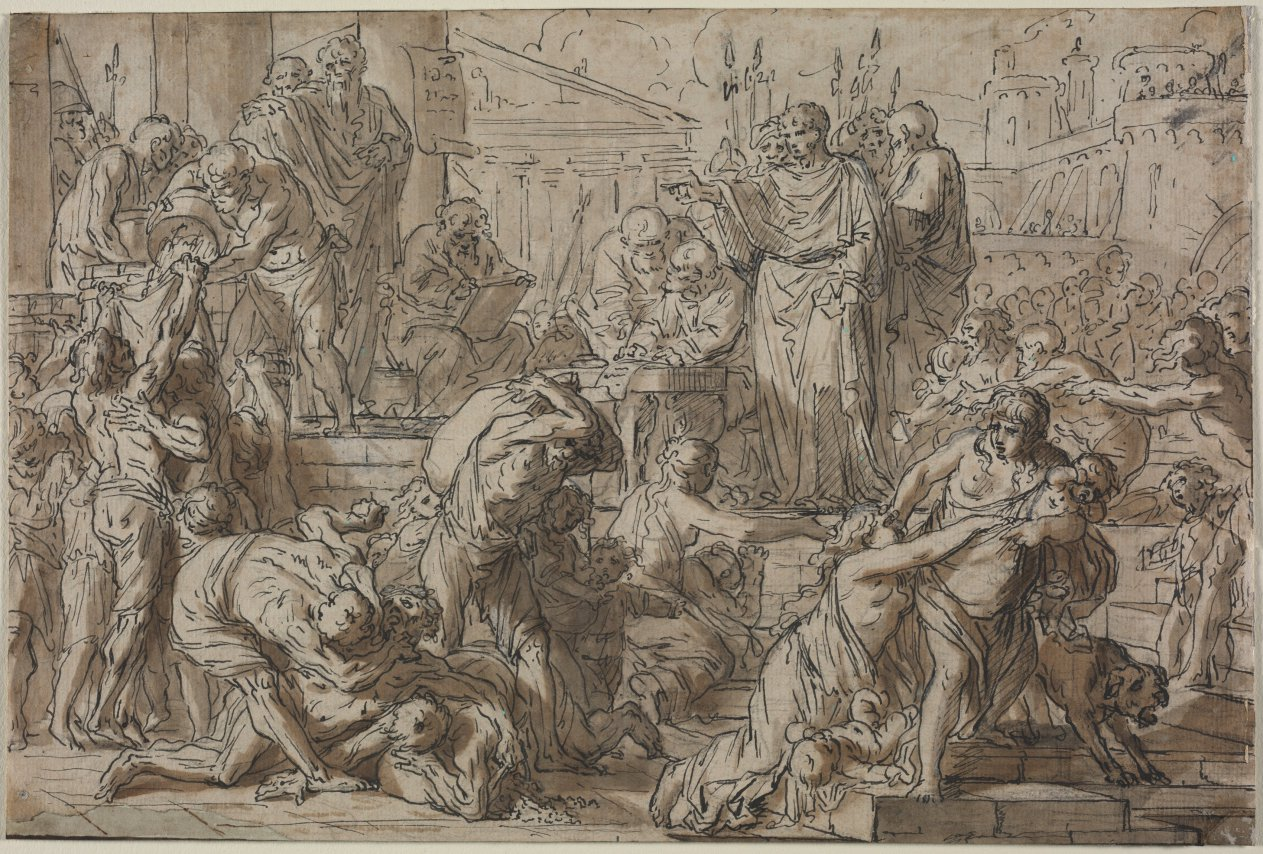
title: Roman Subject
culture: France, 18th century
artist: attributed to Philibert Benoît Delarue (French, 1718–1780)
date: 1700s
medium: pen and black ink and brush and brown wash over black chalk, heightened with white gouache; framing lines in brown ink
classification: Drawing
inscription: secondary support is a ledger with letterpress words indicating military personnel